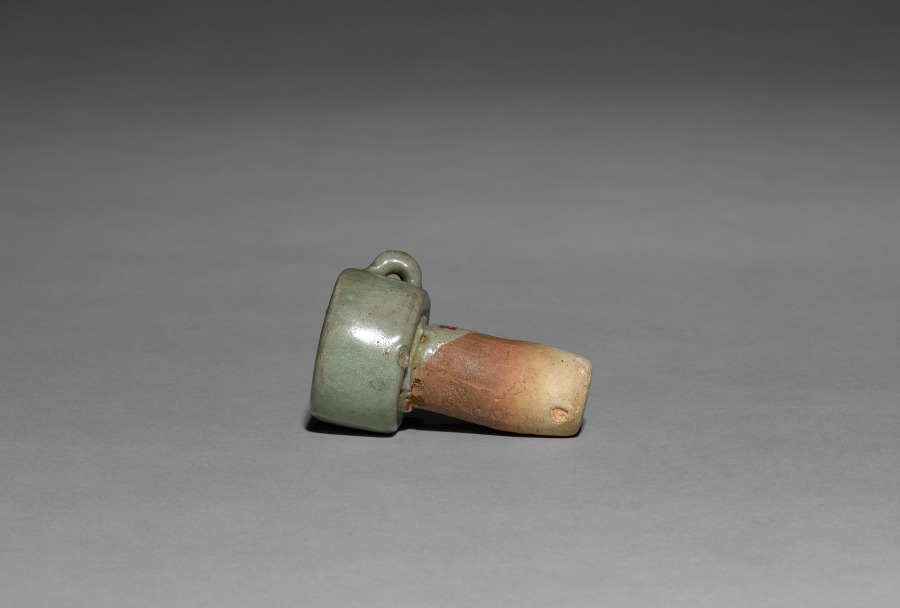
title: Wine Pot (lid)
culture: Korea, Goryeo dynasty (918–1392)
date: 918–1392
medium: pottery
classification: Ceramic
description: As early as the seventh century, the practice of drinking tea and wine became an important part of elite culture in Korea. Elites of the Goryeo period commissioned a variety of types of utensils and vessels including this elegant wine pot, not only to make their drinking experience more exciting, but also to show their appreciation of nature.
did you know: A chain or cord once connected a small loop on the handle and the lid to serve beverages without spilling.